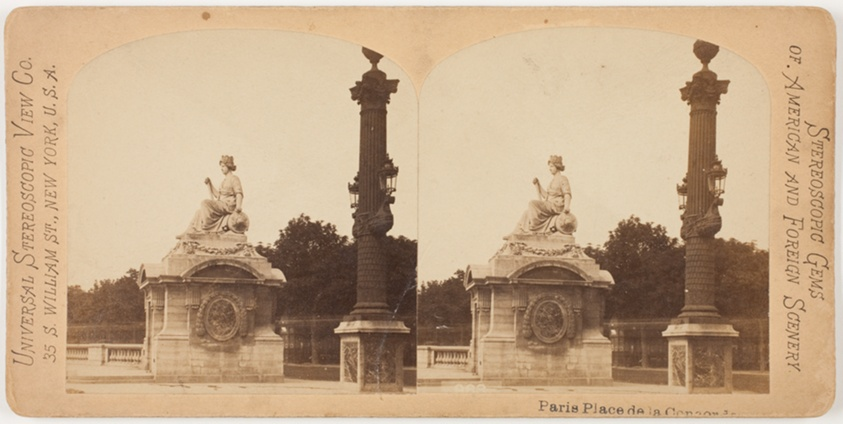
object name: Photograph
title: Place de la Concorde, Paris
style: 19th century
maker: Artist unknown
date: 1860s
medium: Albumen print, stereo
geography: Paris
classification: photograph; albumen silver print; photography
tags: Paris